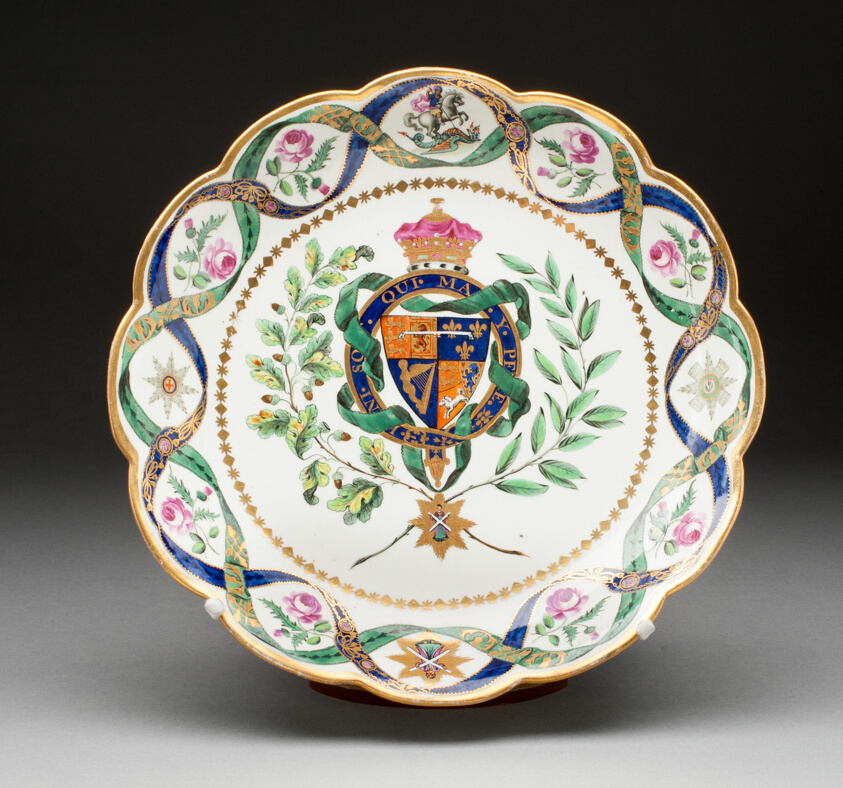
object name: Ceramics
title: Plate from the Duke of Clarence Service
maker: Worcester Porcelain Factory (Flight Period, 1783-1792); Worcester, England, founded 1751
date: 1789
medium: Soft-paste porcelain, polychrome enamels, and gilding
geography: Worcester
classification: plate (general, dish); tableware; dish (vessel); porcelain; european decorative arts; ceramics